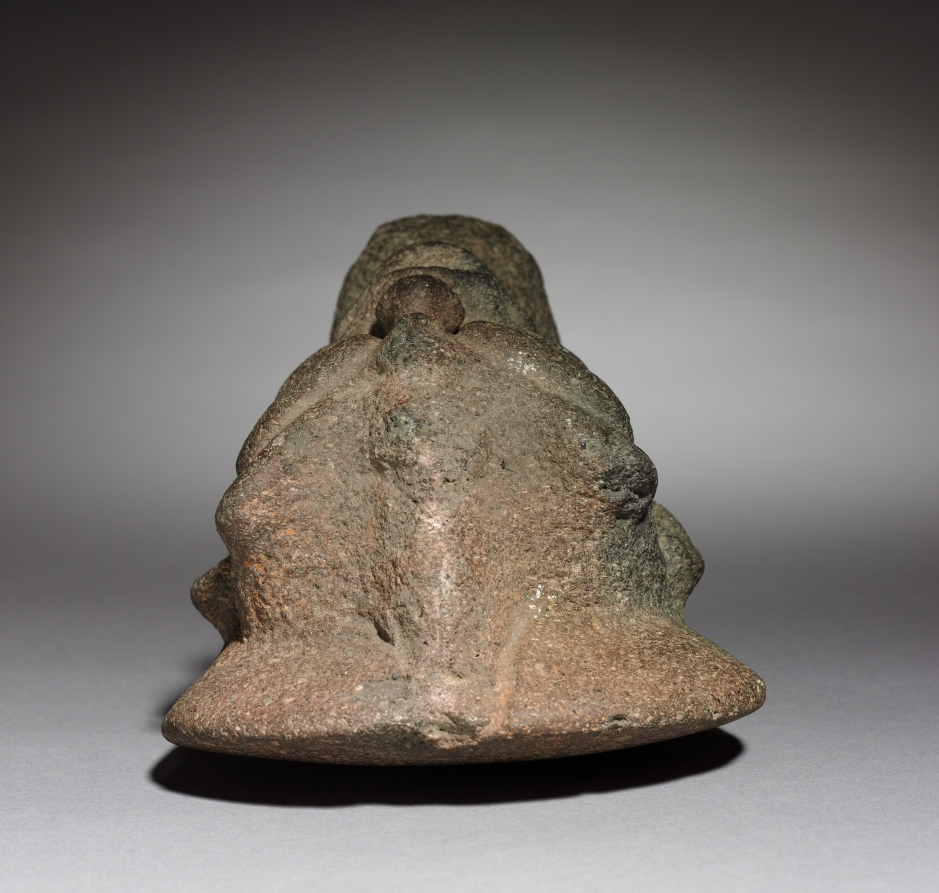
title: Head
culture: Mexico, Classic Veracruz (Totonac or Tajin)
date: 600–1100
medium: stone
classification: Sculpture